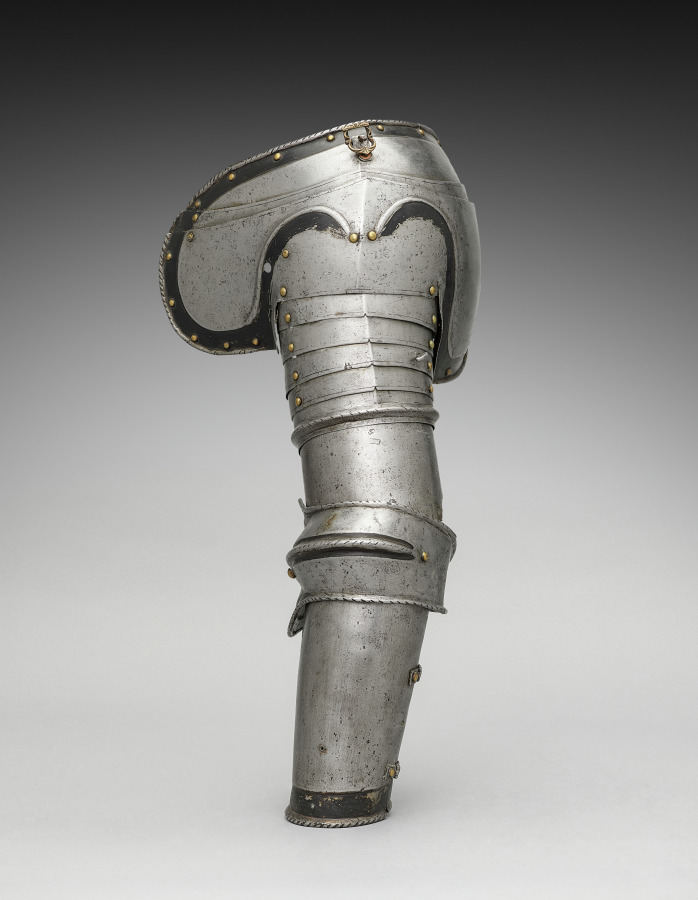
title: Left Pauldron with Rerebrace (upper cannon) and Lower Cannon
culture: Germany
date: c.1550–1570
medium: iron, steel, leather and brass rivets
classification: Arms and Armor